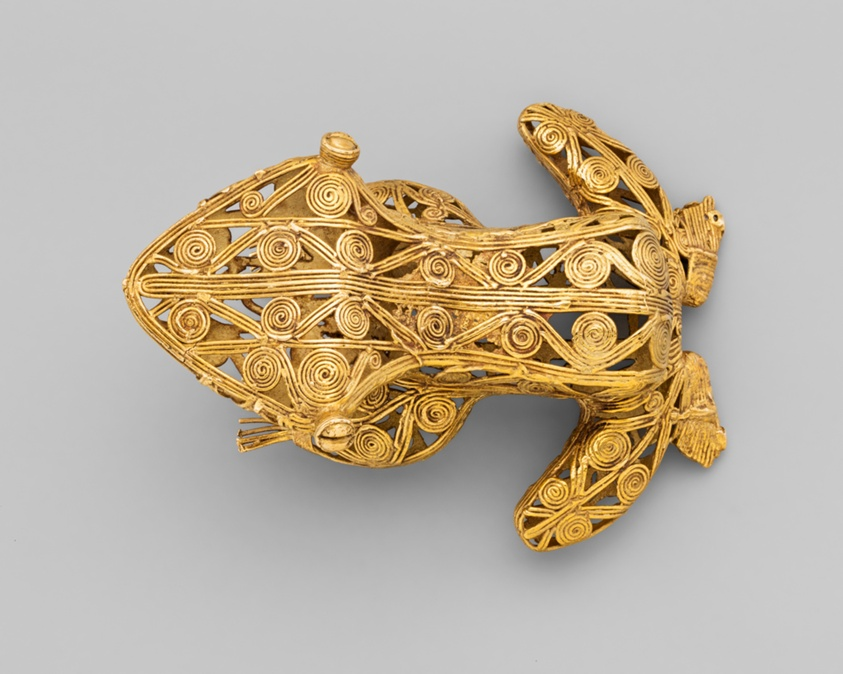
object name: Costume and Accessories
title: Filagree Pendant in the Form of a Frog or Toad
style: coclé, Pre-Columbian, americas, venado beach, lower central america, Arts of the Americas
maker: Coclé (Venado Beach, Coclé province, Panama)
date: 500–1000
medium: Cast gold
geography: Venado Beach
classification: jewelry; pendant (jewelry); metal; art of the americas; costume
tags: frog, animals